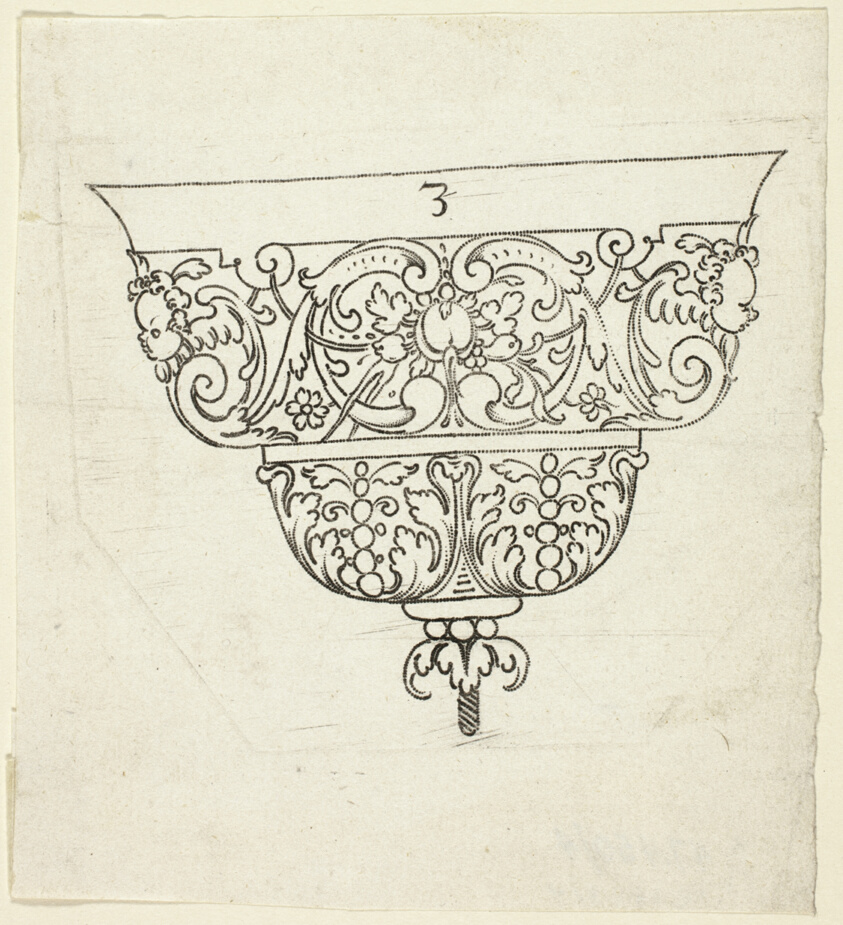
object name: Print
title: Plate 3, from XX Stuck zum (ornamental designs for goblets and beakers)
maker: Master A.P. (German, active early 17th century)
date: 1601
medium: Punch engraving in black on ivory laid paper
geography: Germany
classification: engraving; print; prints and drawing